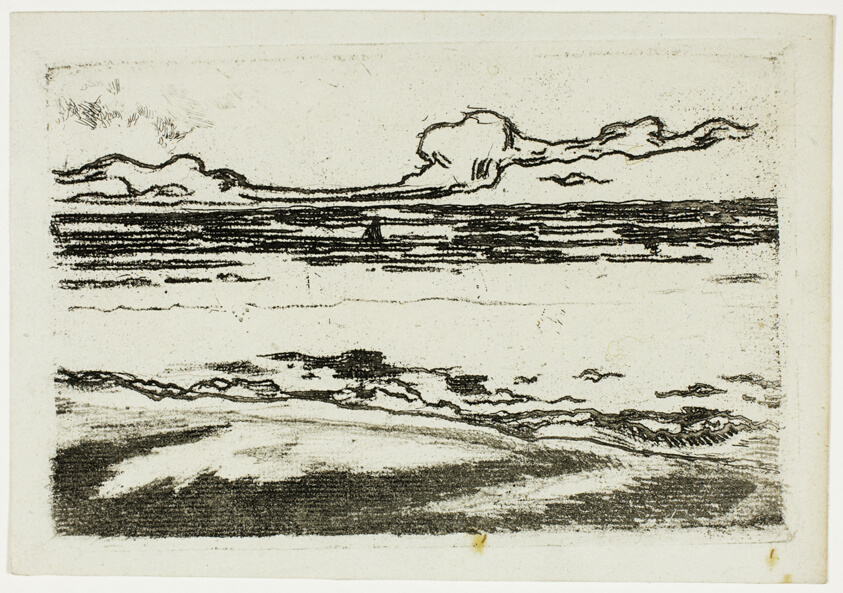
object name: Print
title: The Sea at Bognor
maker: Theodore Roussel (French, worked in England, 1847-1926)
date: 1895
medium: Softground etching in black ink on ivory laid paper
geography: England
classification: etching; paper; print; prints and drawing